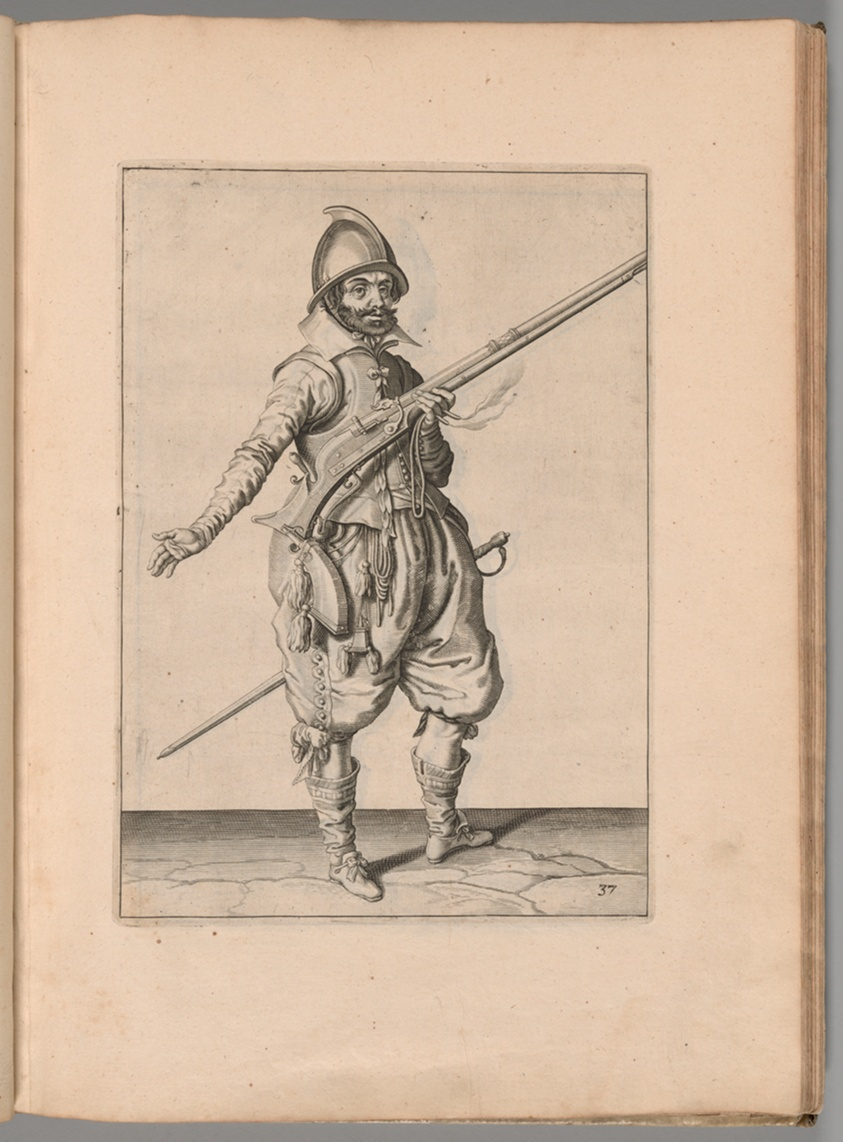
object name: Book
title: Exercise of Arms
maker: Jacob de Gheyn, II (Dutch, 1565-1629)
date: 1608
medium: Illustrated book featuring 117 copper plate engravings on ivory laid paper; full vellum binding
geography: Netherlands